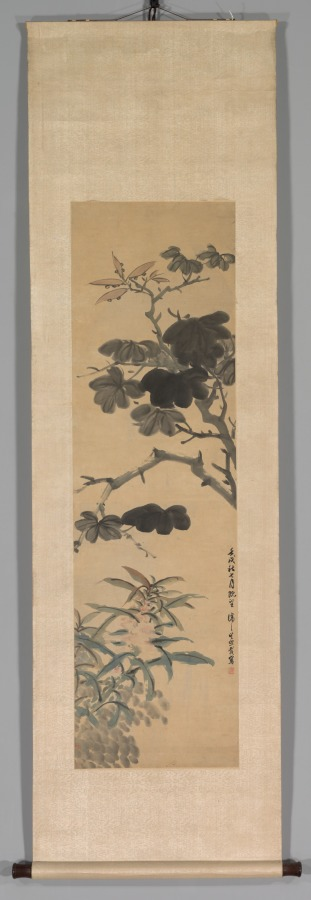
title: Flowering Plants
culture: China, Qing dynasty (1644-1911)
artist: Wu Rangzhi (Chinese, 1799–1870)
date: 1862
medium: hanging scroll, ink and color on paper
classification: Painting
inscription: Signed and dated inscription by the artist with one seal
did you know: Painter and calligrapher Wu Rangzhi was also an expert in seal cutting.